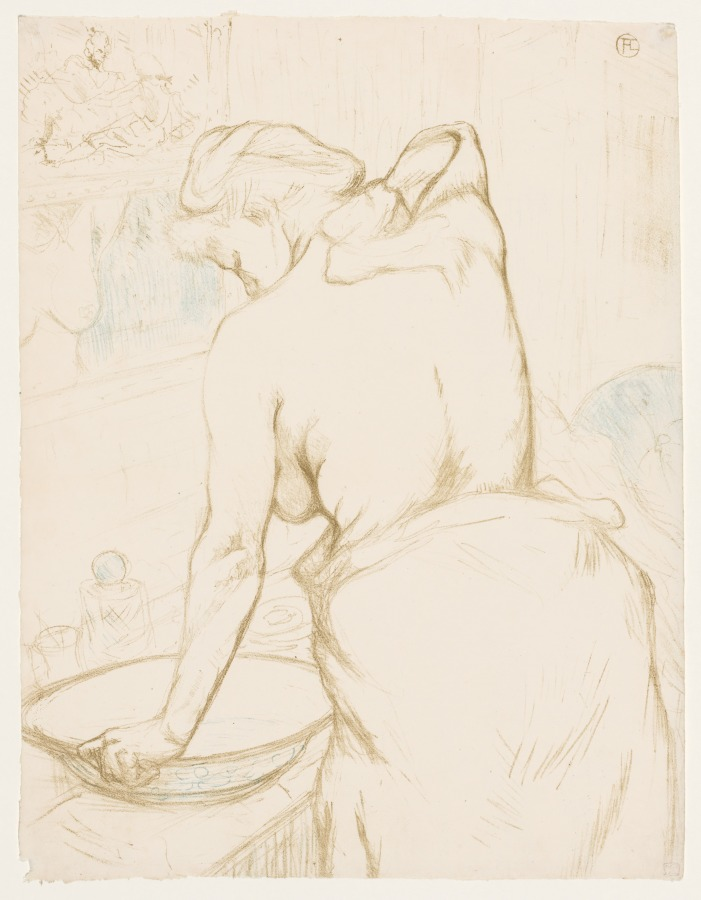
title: Elles: The Toilet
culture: France, 19th century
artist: Henri de Toulouse-Lautrec (French, 1864–1901)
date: 1896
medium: color lithograph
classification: Print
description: The French publisher Gustave Pellet, hoping to attract new customers, persuaded Lautrec to make a series of ten prints, plus frontispiece and cover, depicting brothels. Although it was not unusual to see prostitutes pictured in the popular press, Lautrec was the first well-known, successful artist to tackle this subject. The set was a commercial failure when it first appeared, perhaps because the scenes are not erotic. Lautrec had said that "they are women to my liking", and between 1892 and 1895 he often lived in various Parisian brothels for weeks at a time. This allowed him to witness the daily lives of the women, including the intimate acts of sleeping and bathing, and to sense their suffering. The result is that only two of the scenes show prostitutes as desirable temptresses. The remainder depict the mundane routine of the women's private world, their caring for each other, their boredom, and, living on the periphery of society, their sense of isolation. Lautrec did not take a direct moral stand. He portrayed the women sympathetically, restoring to them their humanity. One scene shows Juliette Baron, whose life of vice has led to premature aging, bringing her daughter Paulette breakfast. Other images depict the women at private moments, bathing or combing their hair in natural, relaxed poses, unaware of being observed. The beauty of the drawing and use of color makes this set one of the masterpieces of late nineteenth-century French color lithography.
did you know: This print belongs to a portfolio published by the dealer Gustave Pellet, who created a special luxury paper that featured a watermark of his initials.